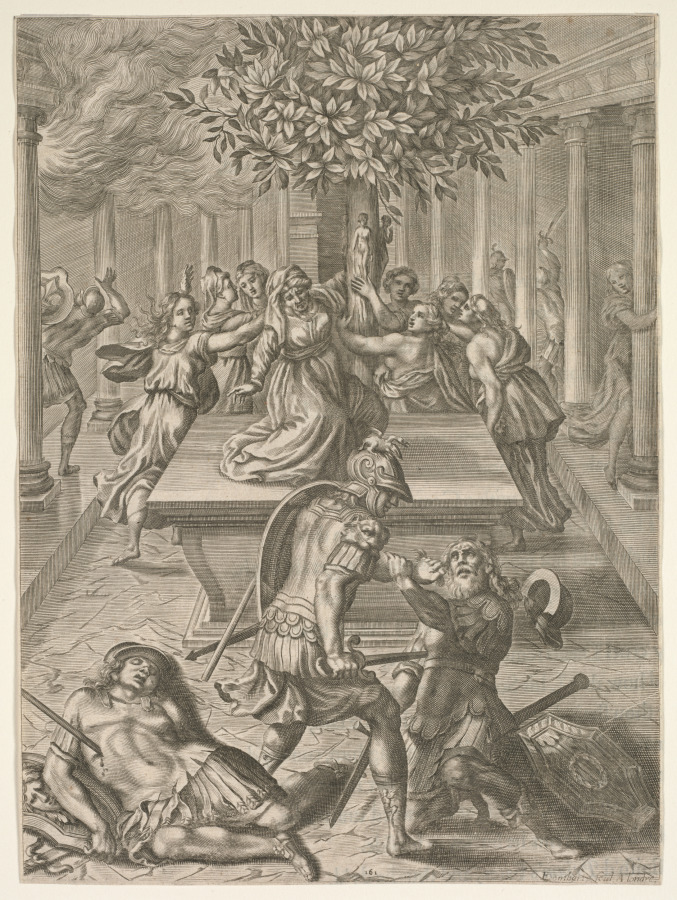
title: Aeneid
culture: France, 17th century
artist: Pierre Lombart (French, 1612–1682)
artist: after Francis Cleyn (German, 1582–1658)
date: 1658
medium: engraving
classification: Print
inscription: On mat: Lombart after Cleyn illust. From 1st edition of Aeneid